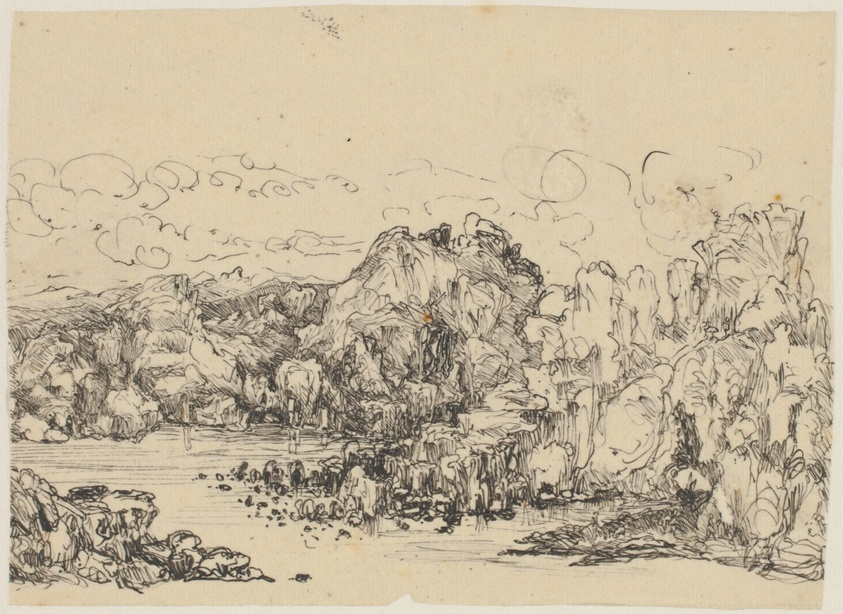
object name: Drawing and Watercolor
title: Rocks by the Sea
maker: Rodolphe Bresdin (French, 1825-1885)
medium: Pen and black ink, on tracing paper, laid down on ivory wove paper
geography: France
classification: pen and ink drawings; drawings (visual works); prints and drawing